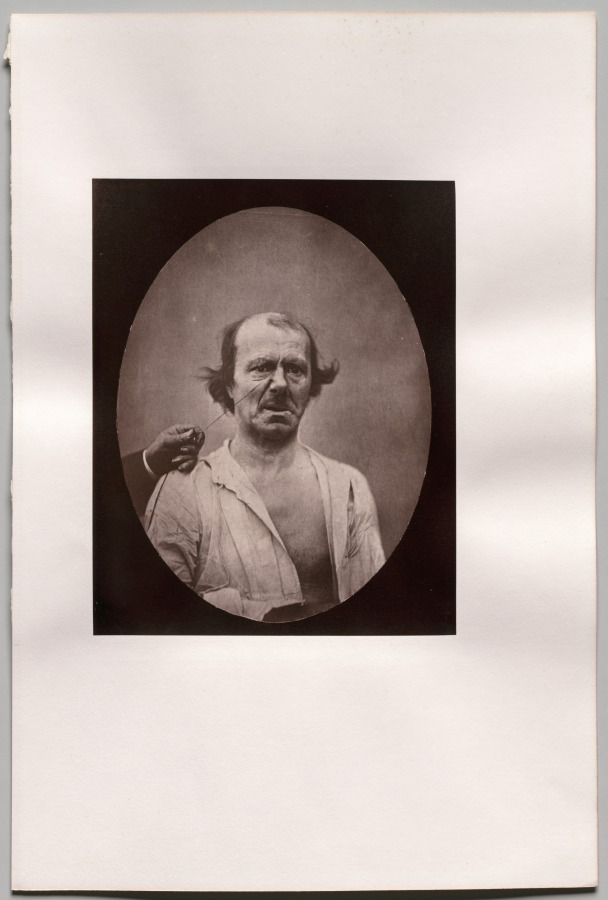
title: Figure 51: À droite, contraction partielle de l'élévateur commun de l'aile du nez et de la lèvre supérieure: mécontentement, mauvaise humeur; à gauche, repos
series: Mécanisme de la physionomie humaine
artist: Guillaume-Benjamin-Amand Duchenne (de Boulogne) (French, 1806–1875)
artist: Adrien Tournachon (French, 1825–1903)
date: c. 1856, printed 1862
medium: Albumen print from glass plate negative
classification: Photograph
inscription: On the verso, lower left, in graphite, “fig. 51”.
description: This photograph is part of the first systematic exploration of the physiology of human facial expression. In order to demonstrate how each individual muscle contributed to creating an expression, Duchenne stimulated one or more muscles on one side of the face and left the other at rest.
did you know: Duchenne, a neurologist at a hospital for the poor in Paris, turned to photography to record the grammar of human expression.